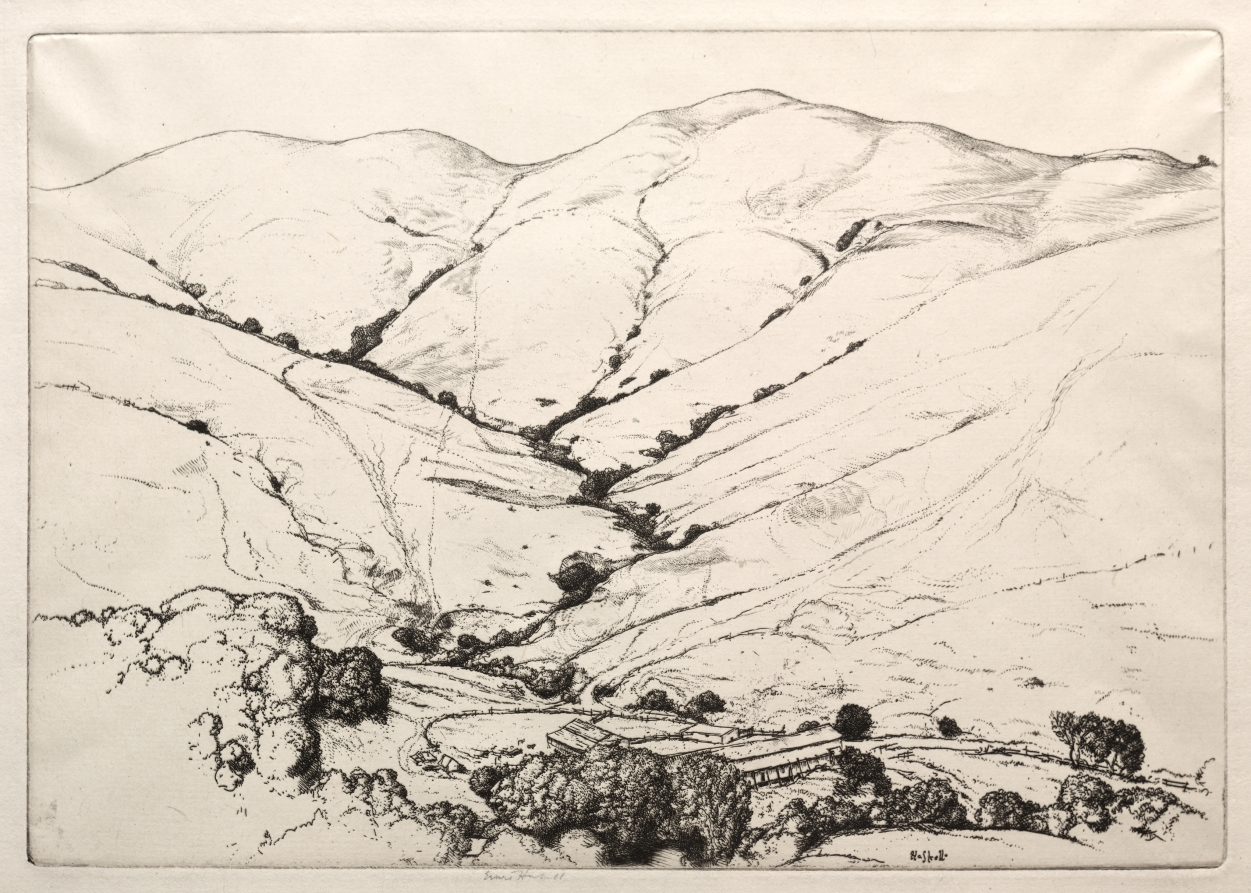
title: Wildcat Canyon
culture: America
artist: Ernest Haskell (American, 1876–1925)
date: 1919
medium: etching and engraving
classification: Print